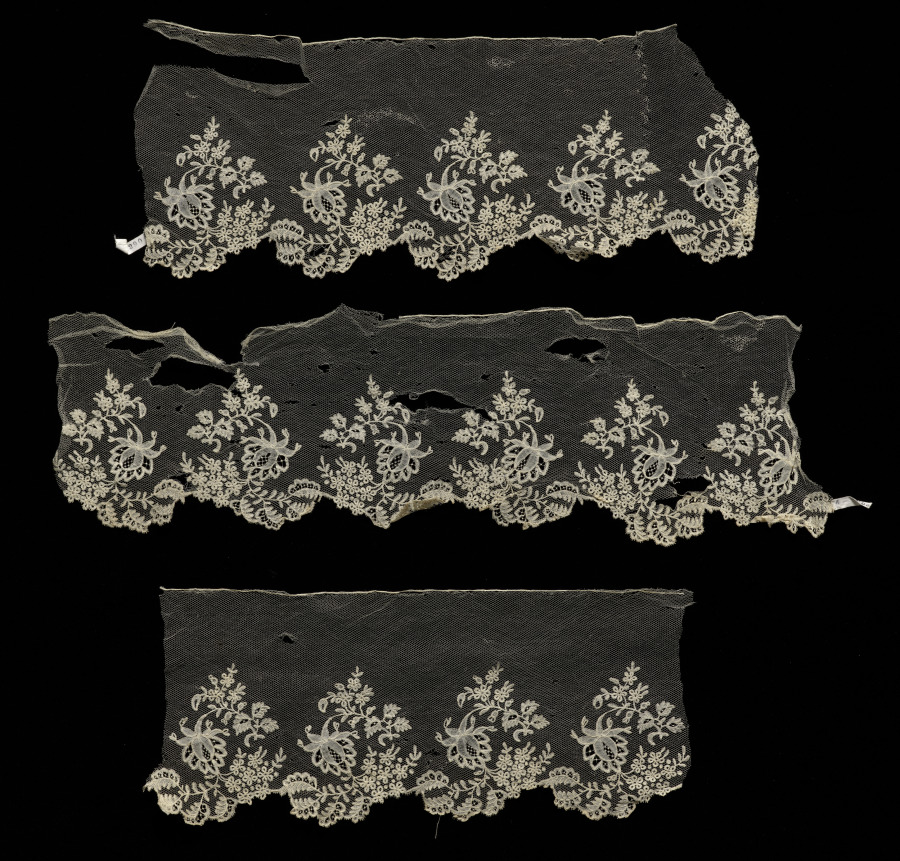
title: Lace Flounce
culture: Belgium; Brussels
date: 1800s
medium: Bobbin lace (Point Plat Applique) applied to machine-made net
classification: Lace